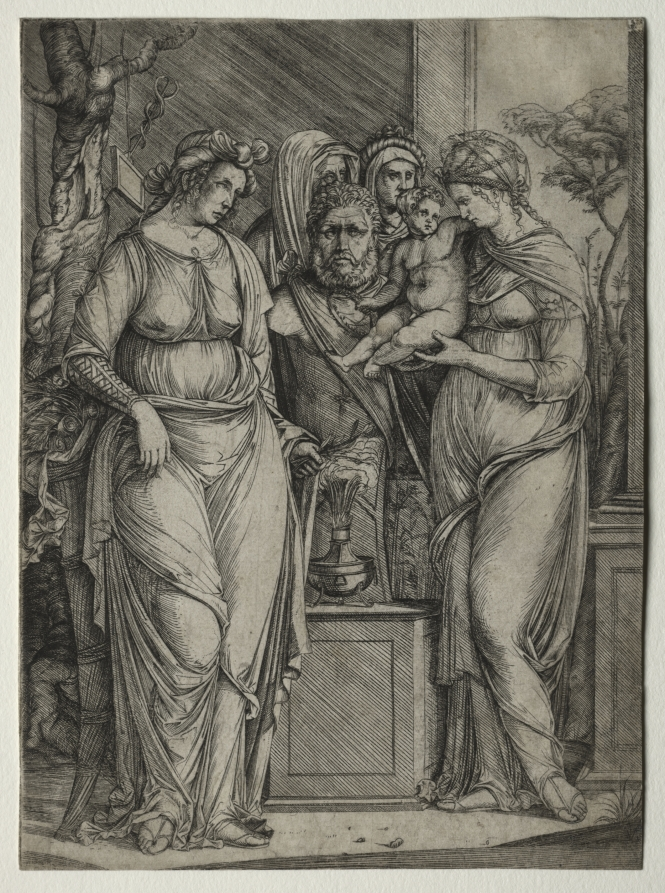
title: Sacrifice of Priapus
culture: Italy, 20th century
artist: Jacopo de' Barbari (Italian, c. 1460/70–c. 1516)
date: c. 1499–1501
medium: engraving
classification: Print